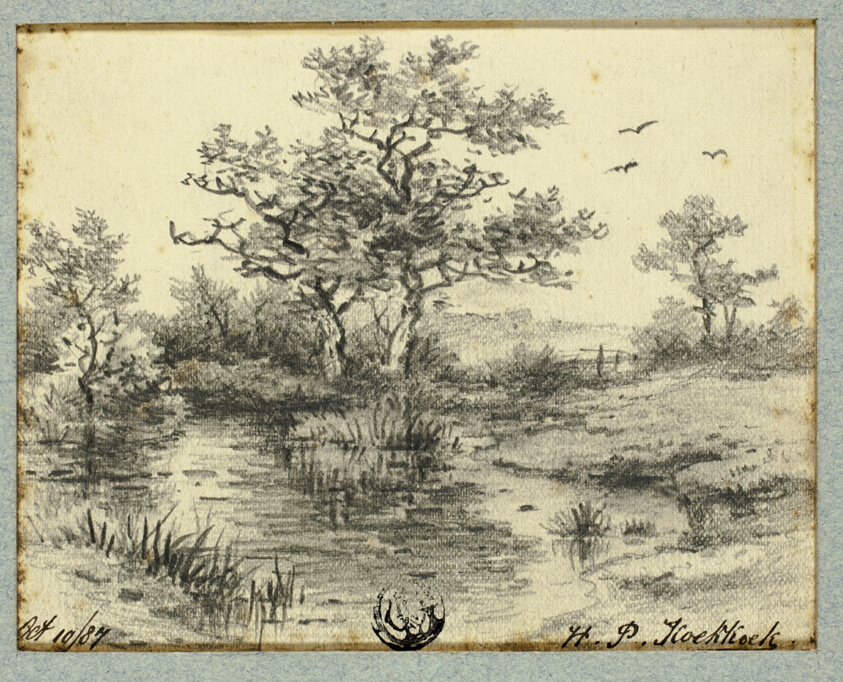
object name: Drawing and Watercolor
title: Trees by Pond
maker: Hendrik Pieter Koekkoek (Dutch, 1843-c. 1890)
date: October 10, 1877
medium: Graphite on cream wove paper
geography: Holland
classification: graphite; drawings (visual works); prints and drawing